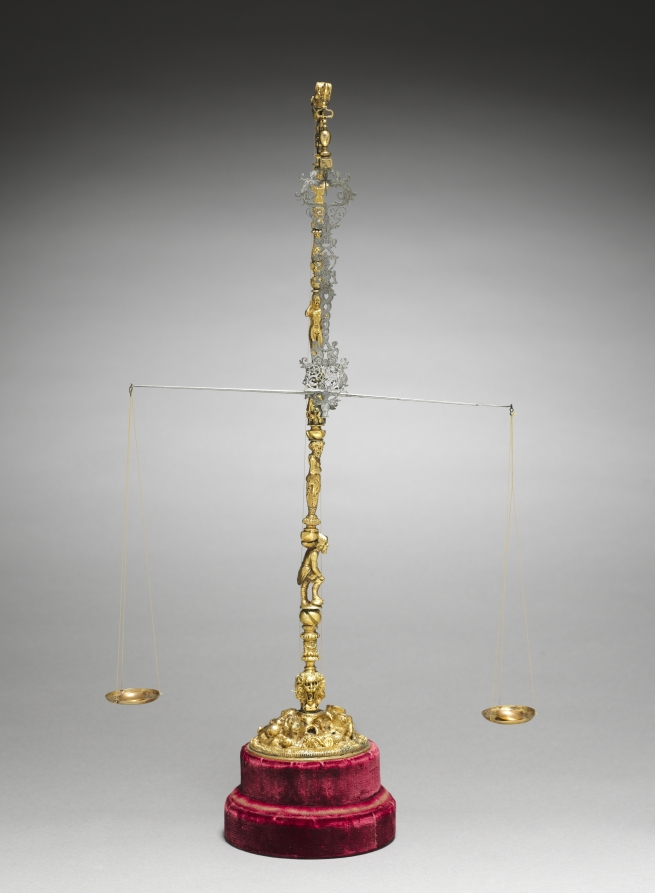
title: Scales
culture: Germany, Nuremberg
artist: workshop of Wenzel Jamnitzer I (German, 1508/09–1585)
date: c. 1525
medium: gilt bronze and silver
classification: Metalwork